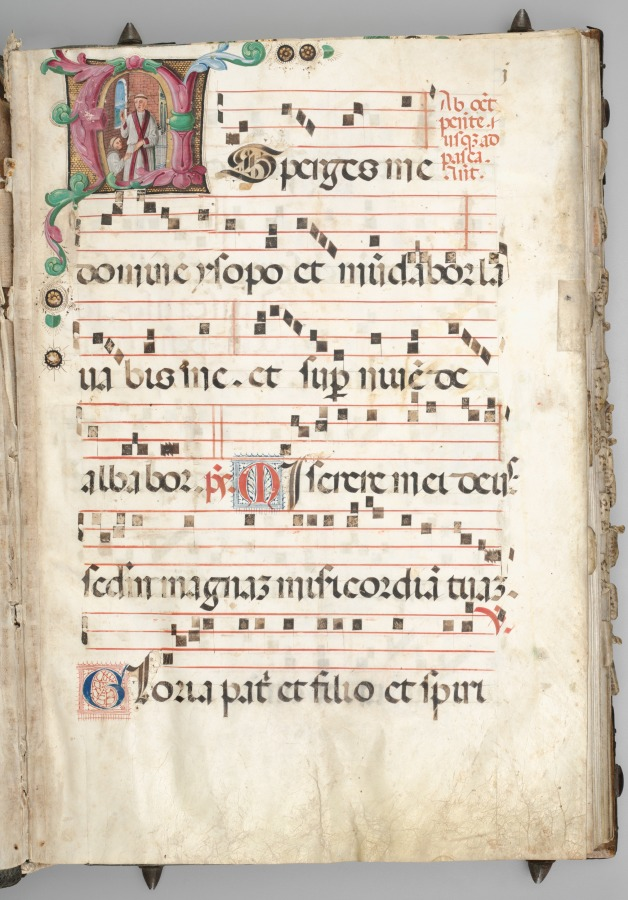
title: Gradual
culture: Italy, Verona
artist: circle of Girolamo dai Libri (Italian, 1474–1555)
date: c. 1520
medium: Ink, tempera, and gold on vellum; wood binding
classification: Manuscript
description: The liturgical book known simply as a “gradual” was the principal choir book used during the Mass. They were produced in multiple volumes, sometimes as many as 12, in order to cover the entire liturgical year. Every church required a set of graduals in addition to other liturgical books such as missals, antiphonaries, and gospel lectionaries. This volume appears to be the lone survivor from a larger set. Its illuminations were painted by an illuminator working in the circle of the much-esteemed and highly imitated painter Girolamo dai Libri of Verona, who was a prolific painter of altarpieces as well as illuminations for books.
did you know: Girolamo dai Libri was only 16 years old when he painted his first altarpiece.